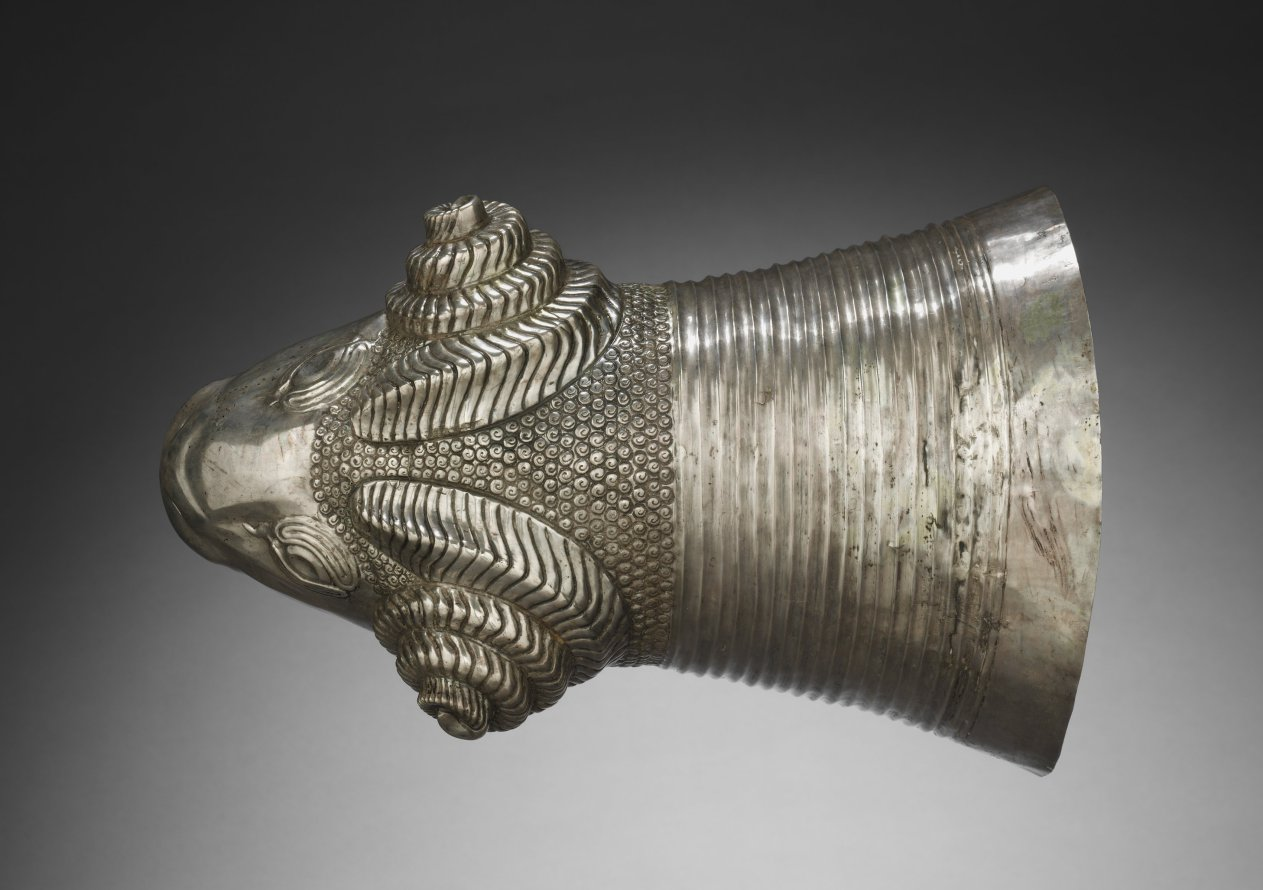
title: Ram-Head Drinking Vessel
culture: Iran, Median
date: c. 600 BCE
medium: silver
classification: Metalwork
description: The Medes, who conquered the Assyrians, were soon conquered by the Achaemenian Cyrus the Great, king of Persia from 559 to 529 BC. The rhyton, or horn-shaped drinking vessel, popular among the Medes, was adopted by the Achaemenians.